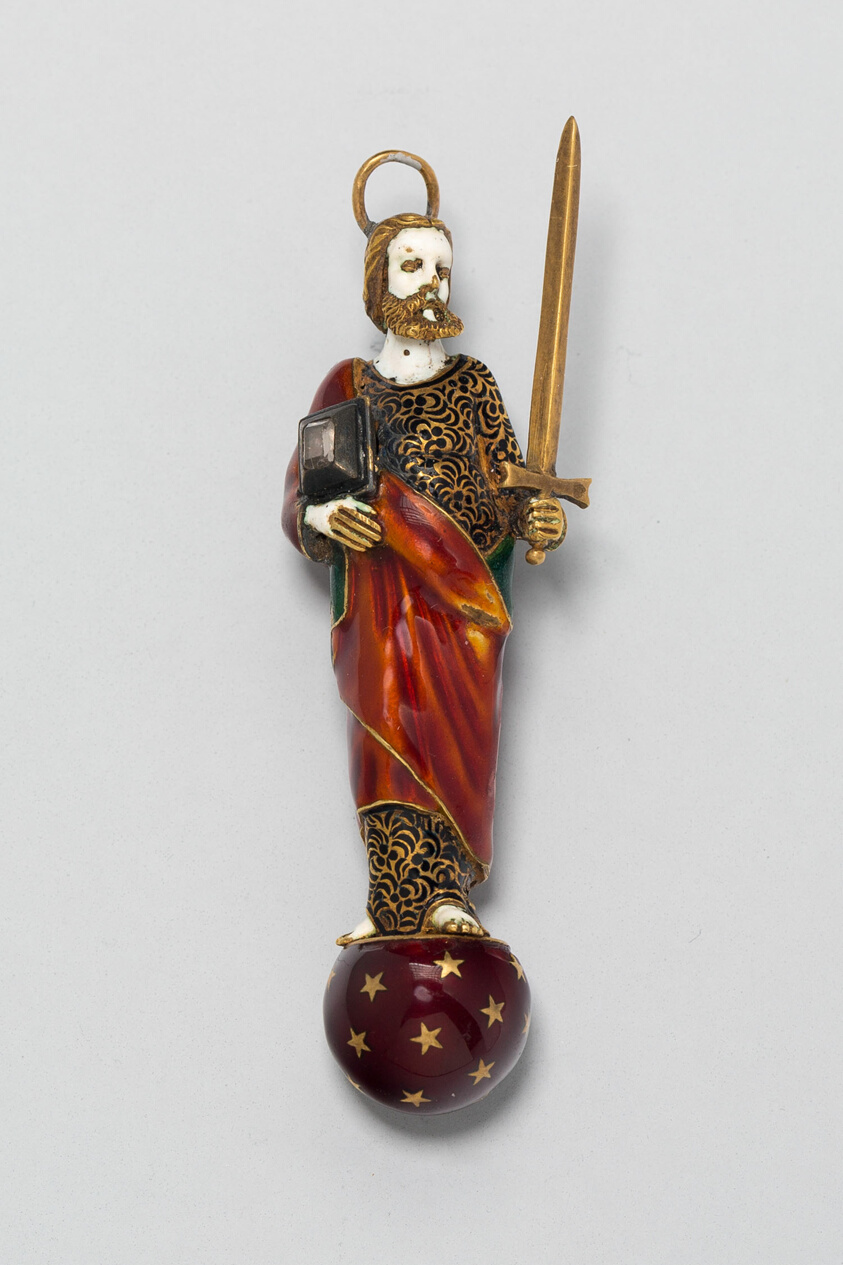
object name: Costume and Accessories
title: Figure of Saint Paul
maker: Salomon Weininger, workshop of; Austrian, 1822-1879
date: 1863/1876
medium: Gold, silver, enamel, and diamond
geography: Italy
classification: jewelry; european decorative arts; costume